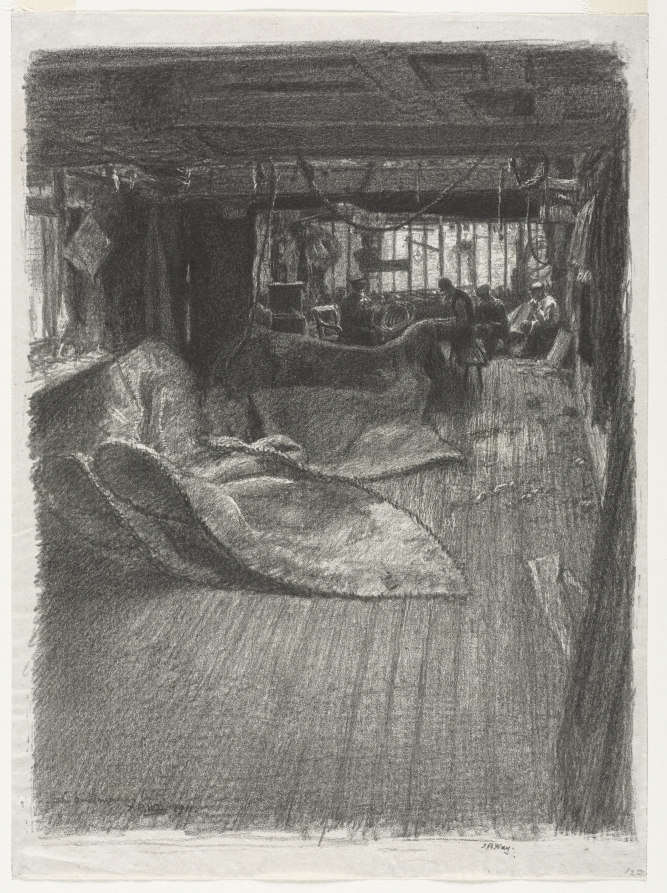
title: The Sailmaker's Loft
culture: England, 20th century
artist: Thomas Robert Way (British, 1861–1913)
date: 1911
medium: lithograph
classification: Print